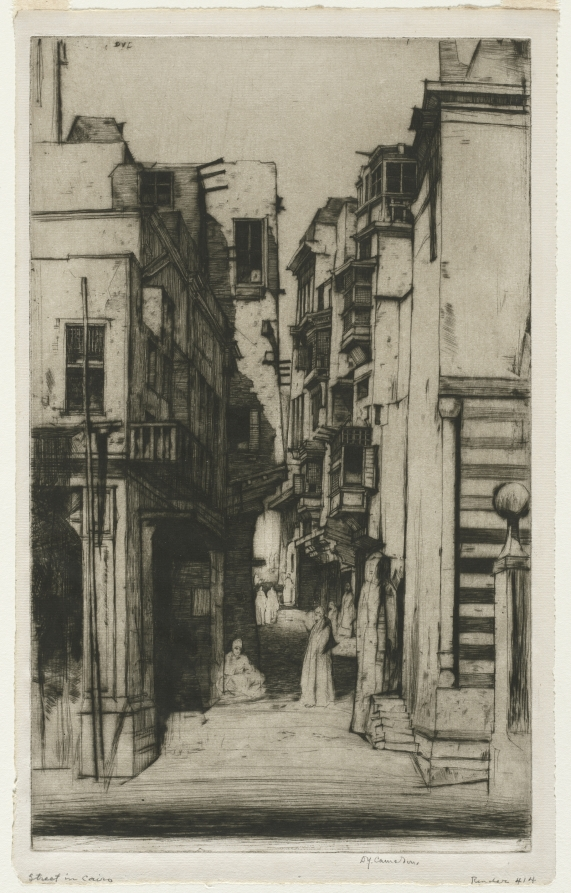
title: Street in Cairo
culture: England, 20th century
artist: David Young Cameron (British, 1865–1945)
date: 1910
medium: etching and drypoint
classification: Print